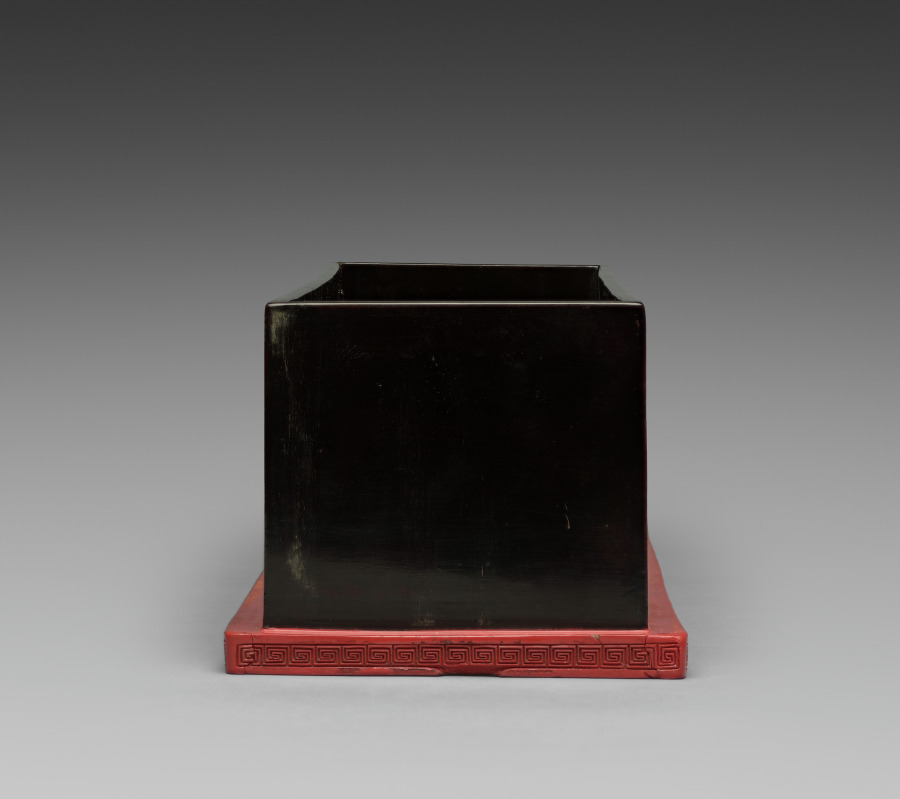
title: Base for a Carved Lacquer Scroll Box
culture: China, Qing dynasty (1644–1911), Qianlong reign (1736–95)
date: 1736–95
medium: cinnabar carved lacquer on wood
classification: Lacquer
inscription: 心寫治平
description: The elaborate design, superior craftsmanship, and inscription carved into the red cinnabar lacquer proclaim the imperial pedigree of this scroll box. On either end appears a five-clawed dragon, a design reserved only for an emperor. More dragons twist and wind through swirling clouds and waves along the length of the box’s sides and top. The carving is intricate and vigorous, while the design is controlled and regular. This box originally housed the handscroll, CMA 1969.31, private portraits of the Emperor Qianlong, his empress, and 11 other favorites among his presumed 40 or more wives during his 60-year reign.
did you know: This is the original box for the handscroll Portraits of the Qianlong Emperor and His Twelve Consorts, CMA 1969.31.